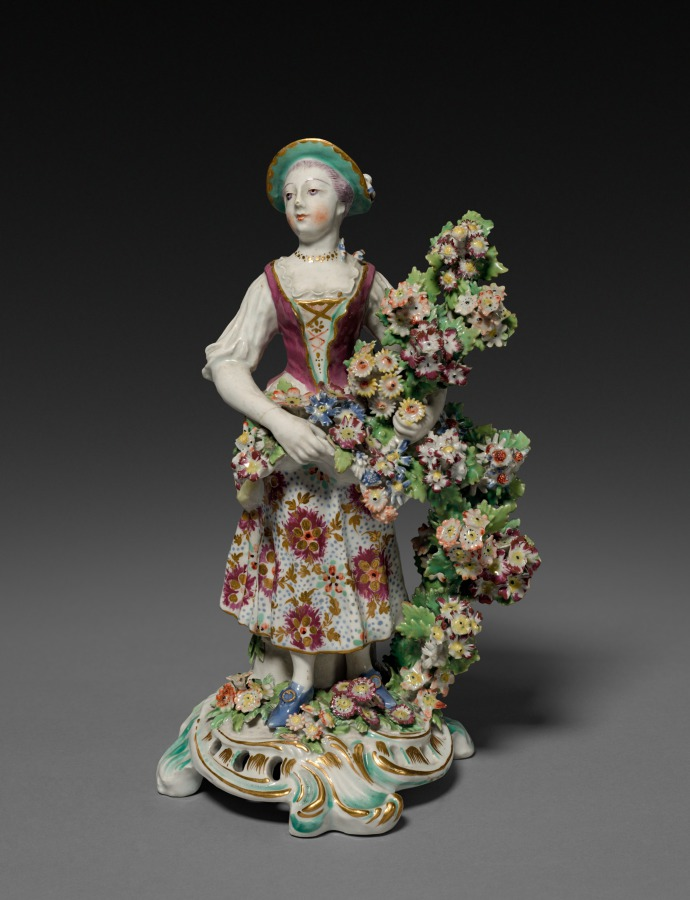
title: Figure of a Gardener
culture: England, London, Bow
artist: Bow Porcelain Factory (British)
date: c. 1765–70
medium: soft-paste porcelain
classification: Ceramic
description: Even though this figure and her counterpart (1945.37) are not accompanied by a sheep, these ceramic sculptures were sometimes known as “Garland Shepherds” during the mid-1700s. The name derived from a similar set produced by one of the Bow Porcelain Factory’s rivals, the Derby Porcelain Factory, in which the male figure holds a lamb. While these two factories often produced similar sets of pastoral, allegorical, biographical, and religious figures, the Bow Factory was known as one of the preeminent porcelain manufacturers, rivaled only by the Chelsea Porcelain Factory, with which Bow would later merge.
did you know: Due to the abundance of flowers surrounding this figure, this Gardener has also been considered a personification of Spring.